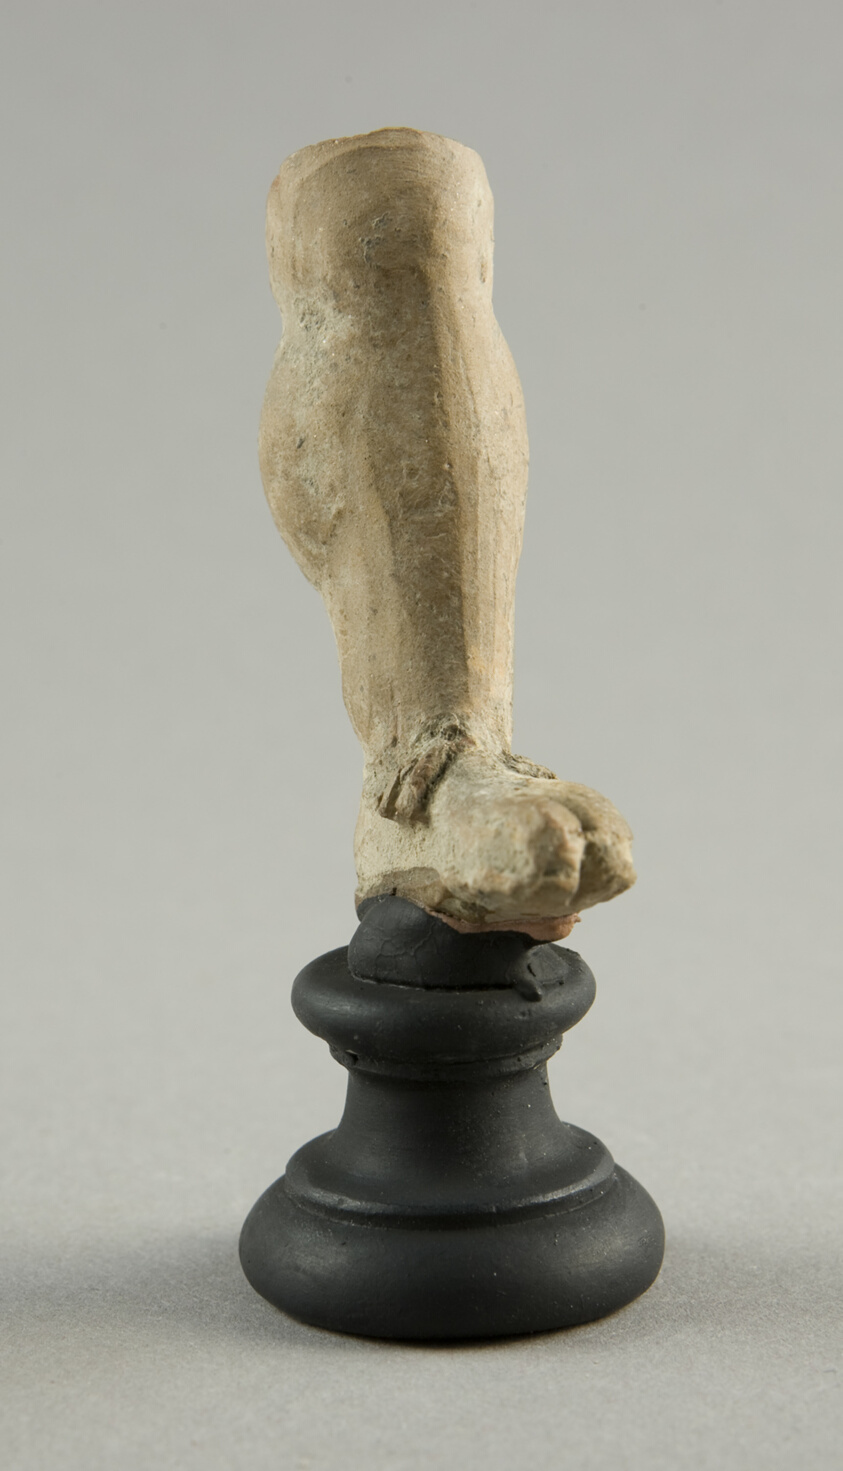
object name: Sculpture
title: Left Leg Broken Off Above Knee Cap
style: greek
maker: Greek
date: 3rd-2nd century BCE ?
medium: terracotta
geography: Greece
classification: earthenware; ceramics; sculpture; ancient art